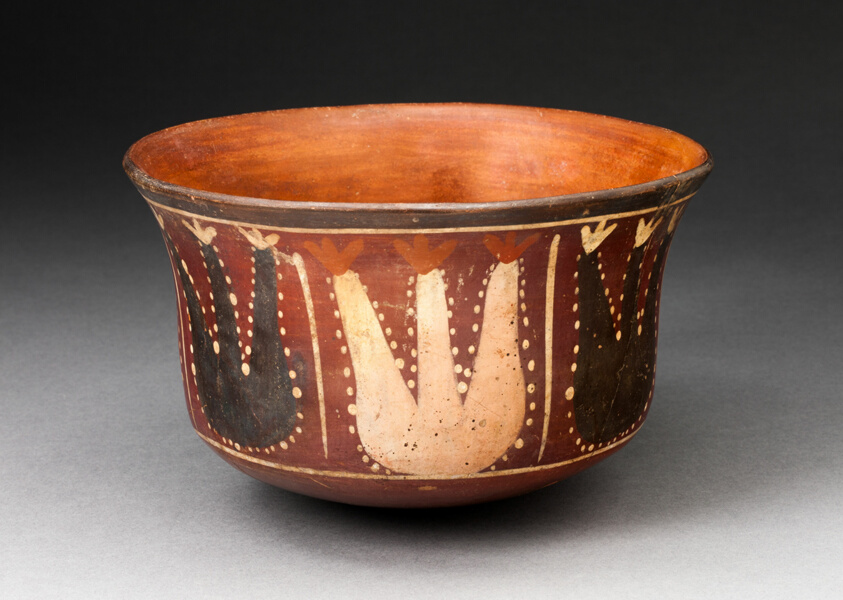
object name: Vessel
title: Bowl Depicting Abstract Plants, Probably Cactus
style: nazca, south american, andes, Arts of the Americas, andean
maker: Nazca; South coast, Peru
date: 180 BCE–500 CE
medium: Ceramic and pigment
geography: Peruvian South Coast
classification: bowl; earthenware; ceramics; vessel; art of the americas